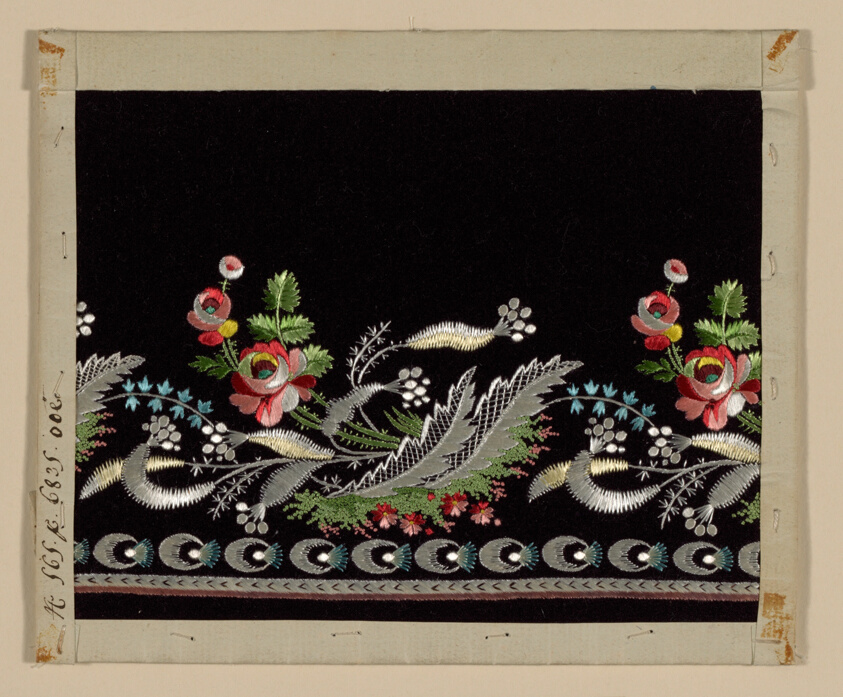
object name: Textile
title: Salesman's Sample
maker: France, possibly Lyon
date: 1780/90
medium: Wool, fulled plain weave; embroidered with silk floss in outline, satin, padded satin and single satin stitches; couching and French knots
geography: France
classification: textile; needlework (visual works)